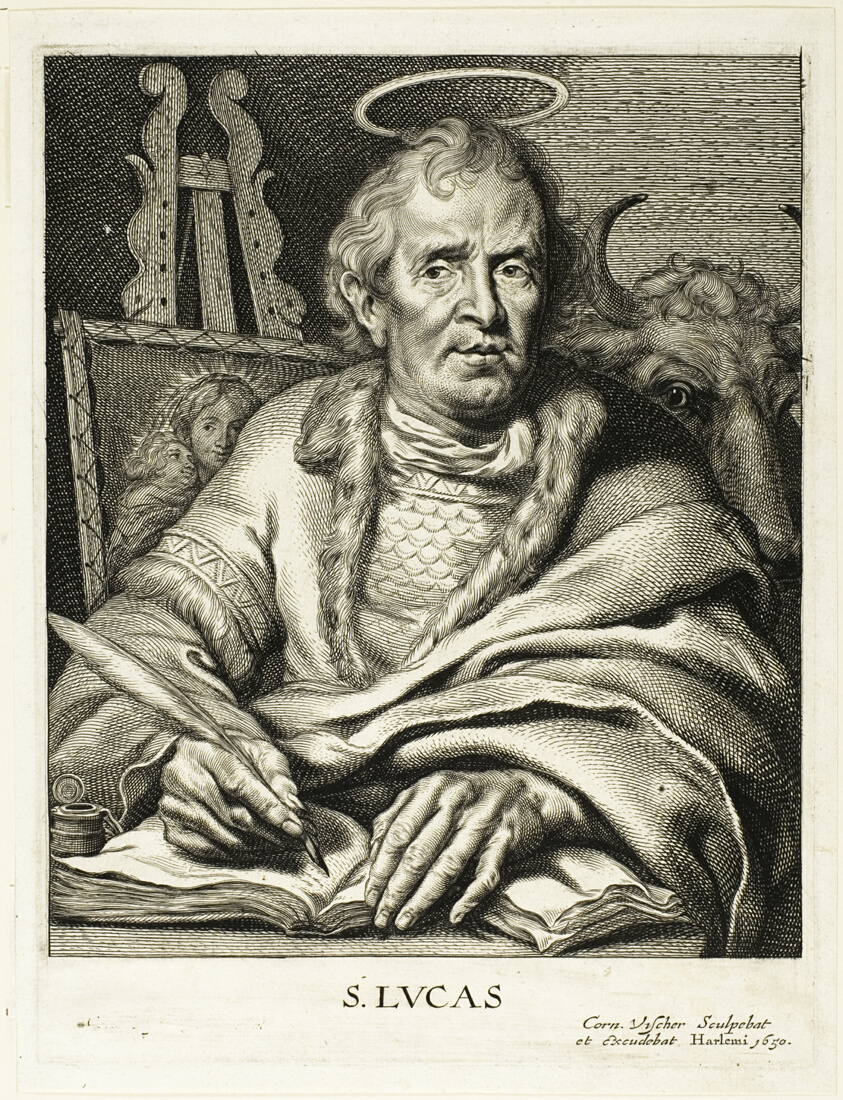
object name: Print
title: Saint Luke, from The Four Evangelists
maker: Cornelis Visscher (Dutch, c. 1629-1658)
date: 1650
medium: Engraving in black on ivory laid paper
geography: Holland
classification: engraving; print; prints and drawing